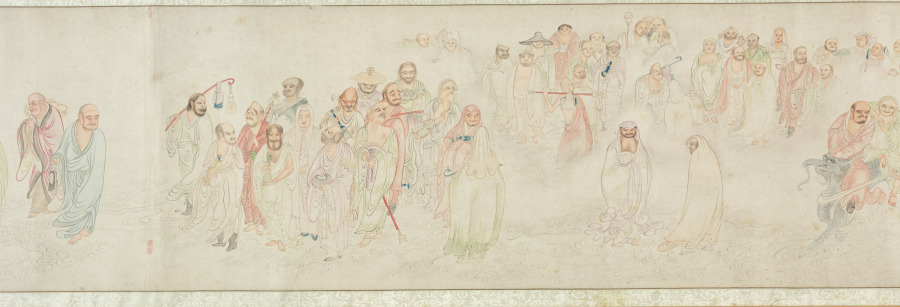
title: The Five Hundred Arhats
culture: China, Ming dynasty (1368–1644)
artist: Wu Bin (Chinese, active c. 1591–1626)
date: 1591–1626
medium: Handscroll; ink and color on paper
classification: Painting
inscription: 枝隱頭陀吳彬齋心拜寫 [印]吳彬之印; 文中父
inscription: 7 seals of Qianlong emperor (r. 1736–95): Gu xi tian zi 古希天子; Shou 壽; Qianlong jian shang 乾隆鑑賞; San xi tang jing jian xi 三希堂精鑑璽; Yi zi sun 宜子孫; Tai shang huang di zhi bao 太上皇帝之寳; Qian qing gong bao 乾清宮寶.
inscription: 6 seals of Cheng Qi 程琦 (1911–1988): Ke an geng zi wu shi yi hou suo de ming ji 可菴庚子五十以後所得名跡; 5 other Cheng Qi seals.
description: More than 66 feet long, this handscroll depicts 447 luohans, 72 attendants, and the bodhisattva of compassion at its very end. Luohans (arhats in Sanskrit), disciples of the Buddha and protectors of the Buddha’s law, possess supernatural powers and take on myriad external appearances. The amusing assortment of characters are engaged in an array of religious, secular, and miraculous activities. The painter used stylistic features borrowed from earlier artists, carefully controlled lines, and refined coloring. Wu Bin was a lay Buddhist and depicting this sort of image was part of a religious practice seeking understanding of the Buddha’s teaching.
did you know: Far advanced on the path to enlightenment, arhats have the capacity to tame tigers, free dragons, and to float on water or in the air.